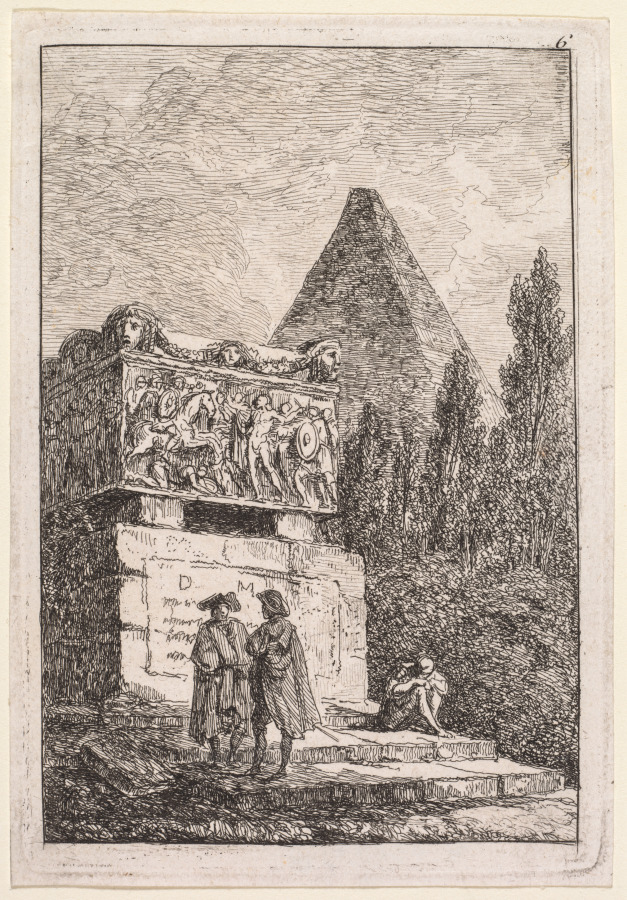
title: Le Sarcophage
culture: France, 18th century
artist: Hubert Robert (French, 1733–1808)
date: 1763–64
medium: etching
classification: Print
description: Derived from his own pen-and-ink drawings, this suite of etchings features fictional characters situated near recognizable buildings and statues in Rome. On the title page, Robert dedicated the suite to Marguerite Le Compte, who visited Rome in 1764 in the company of the wealthy author and art enthusiast Claude Henri Watelet. Both Le Compte and Watelet were amateur etchers, and they socialized with a group that included artists and printmakers centered at the academies in Italy. Robert’s dedication was likely motivated by the hope of future patronage from Le Compte. She may be the generous woman with a hand muff depicted in The Ancient Temple, the fifth scene in this series.